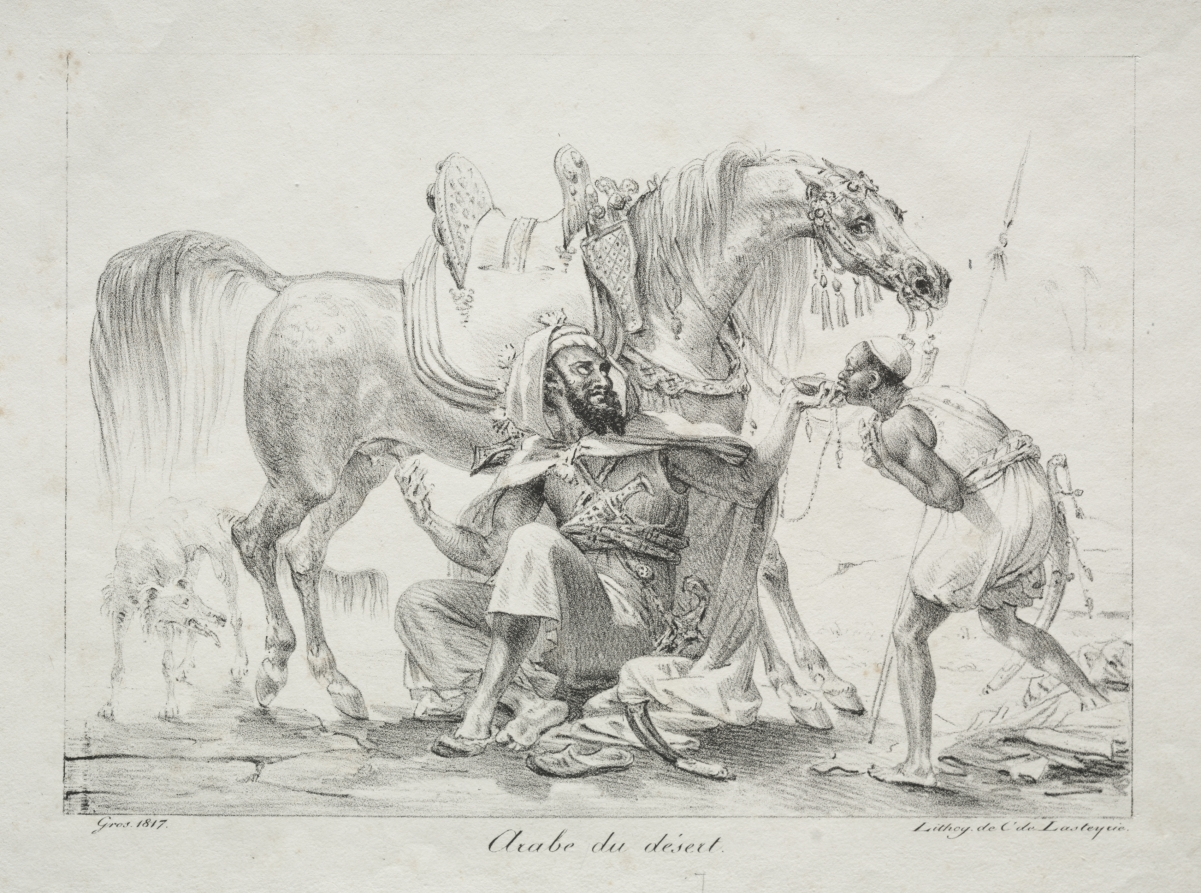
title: Arab of the Desert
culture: France, 19th century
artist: Antoine-Jean Gros (French, 1771–1835)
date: 1817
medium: lithograph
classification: Print